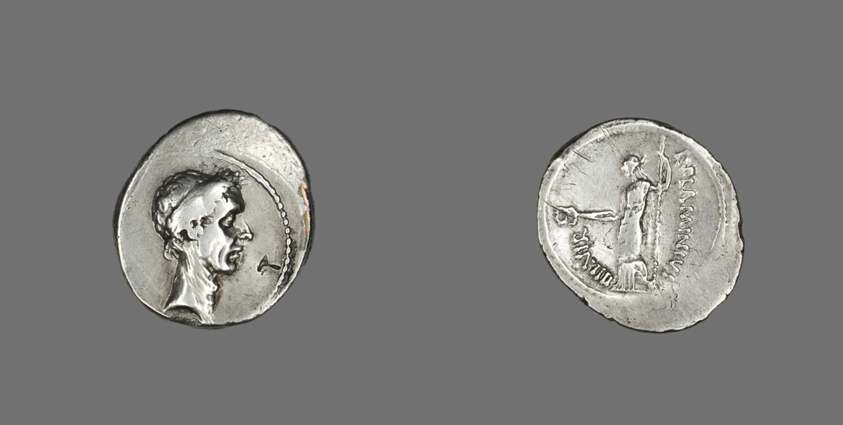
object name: Coin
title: Denarius (Coin) Portraying Julius Caesar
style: republic period, ancient, roman (ancient, style or period)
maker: Roman, minted in Rome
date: 43 BCE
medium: Silver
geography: Italy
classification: coin; ancient art; struck